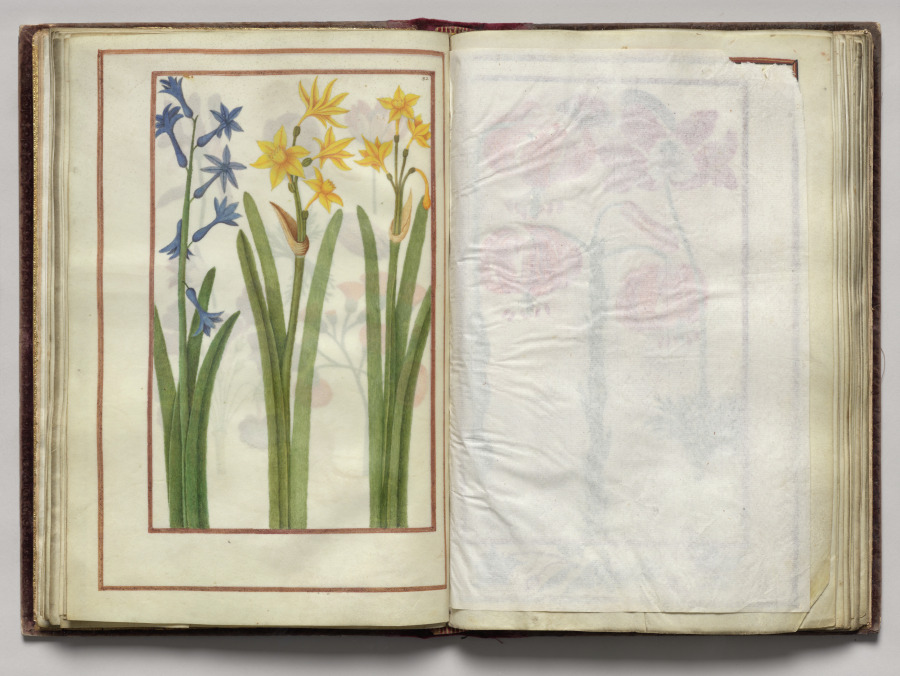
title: Blue Hyacinth and Yellow Narcissus, folio 18 (verso), from Florilegium (A Book of Flower Studies)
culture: France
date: 1608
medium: watercolor, ink, silver, and gold over occasional traces of pencil, on vellum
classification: Bound Volume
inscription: Dated: Poitiers 1608 (on frontispiece) Signed: On frontispiece in black ink, lower right: Van Kuyk Notation on drawing: Frontispiece: in pencil, lower margin: * élève de Van Kessel, peintre flammand (* in pencil also appears in front of Van Kuyk's name).